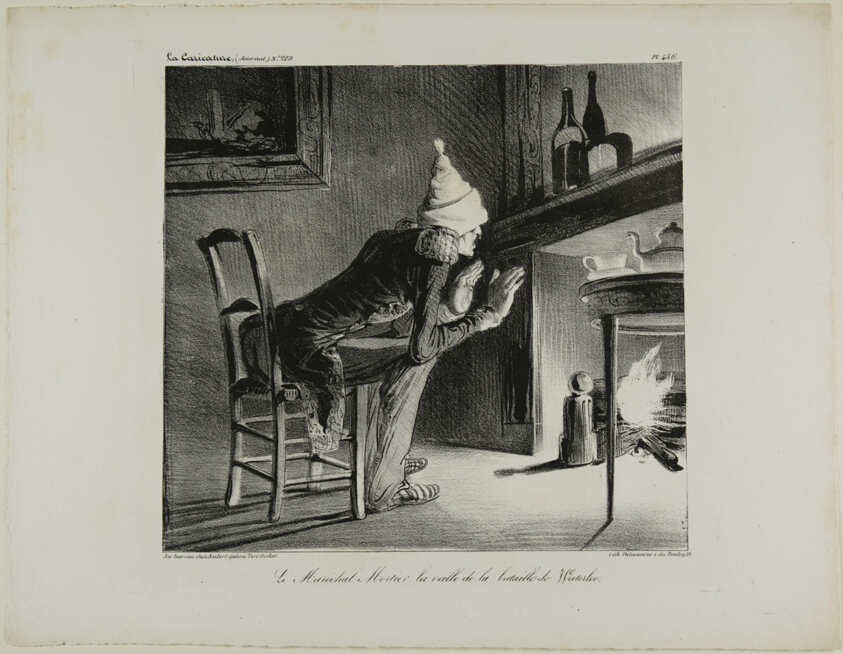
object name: Print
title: General Mortier, the evening before the battle of Waterloo, plate 456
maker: Honoré Victorin Daumier; French, 1808-1879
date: 1835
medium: Lithograph in black on ivory wove paper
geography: France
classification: lithograph; print; prints and drawing